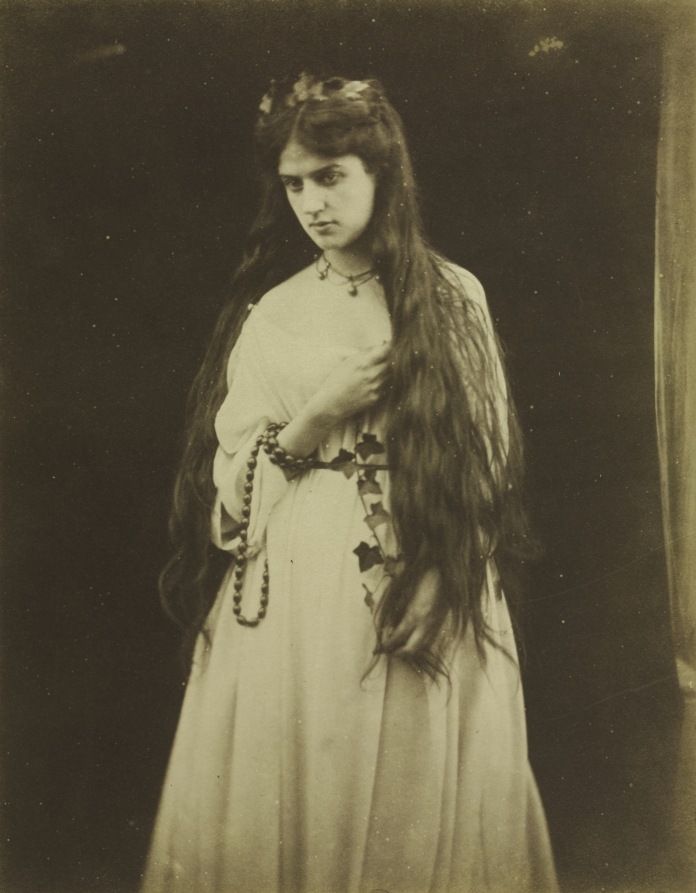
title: Mnemosyne (Marie Spartali, 1844-1927)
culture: England, 19th century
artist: Julia Margaret Cameron (British, 1815–1879)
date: 1868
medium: albumen print from wet collodion negative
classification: Photograph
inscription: Written in pencil on verso: "745-E"; "4 [circled]"